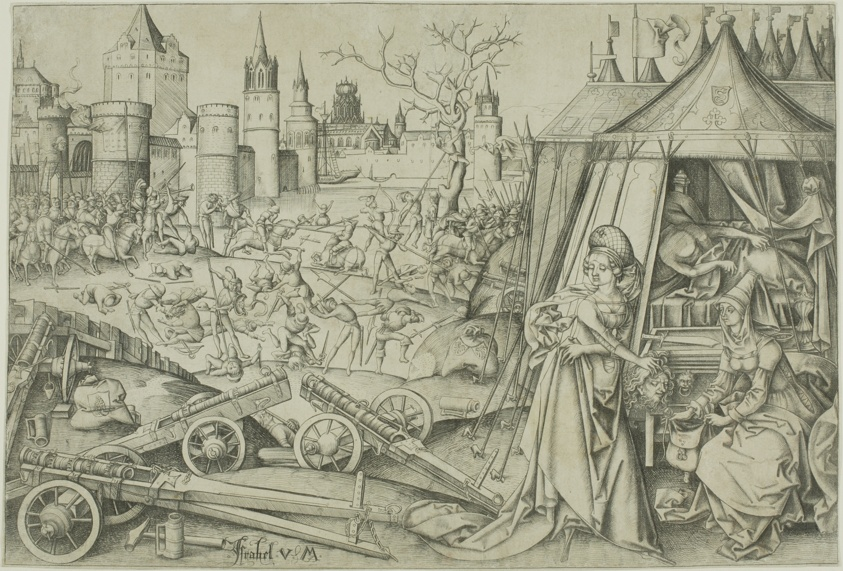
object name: Print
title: Judith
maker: Israhel van Meckenem the Younger; German, c. 1440/45-1503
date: c. 1495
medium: Engraving on ivory laid paper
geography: Germany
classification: engraving; print; prints and drawing